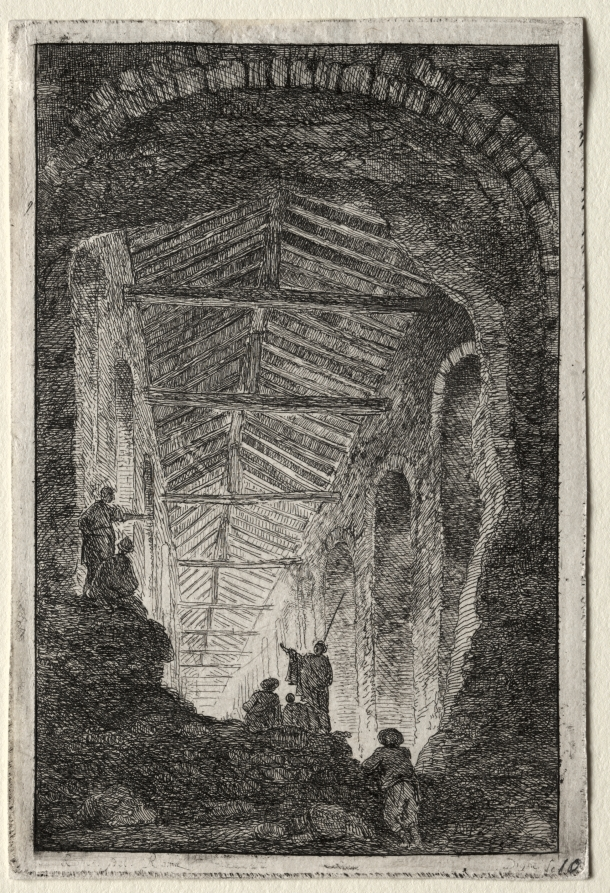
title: The Antique Gallery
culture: France, 18th century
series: Evenings in Rome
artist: Hubert Robert (French, 1733–1808)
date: 1763–64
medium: etching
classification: Print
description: Derived from his own pen-and-ink drawings, this suite of etchings features fictional characters situated near recognizable buildings and statues in Rome. On the title page, Robert dedicated the suite to Marguerite Le Compte, who visited Rome in 1764 in the company of the wealthy author and art enthusiast Claude Henri Watelet. Both Le Compte and Watelet were amateur etchers, and they socialized with a group that included artists and printmakers centered at the academies in Italy. Robert’s dedication was likely motivated by the hope of future patronage from Le Compte. She may be the generous woman with a hand muff depicted in The Ancient Temple, the fifth scene in this series.